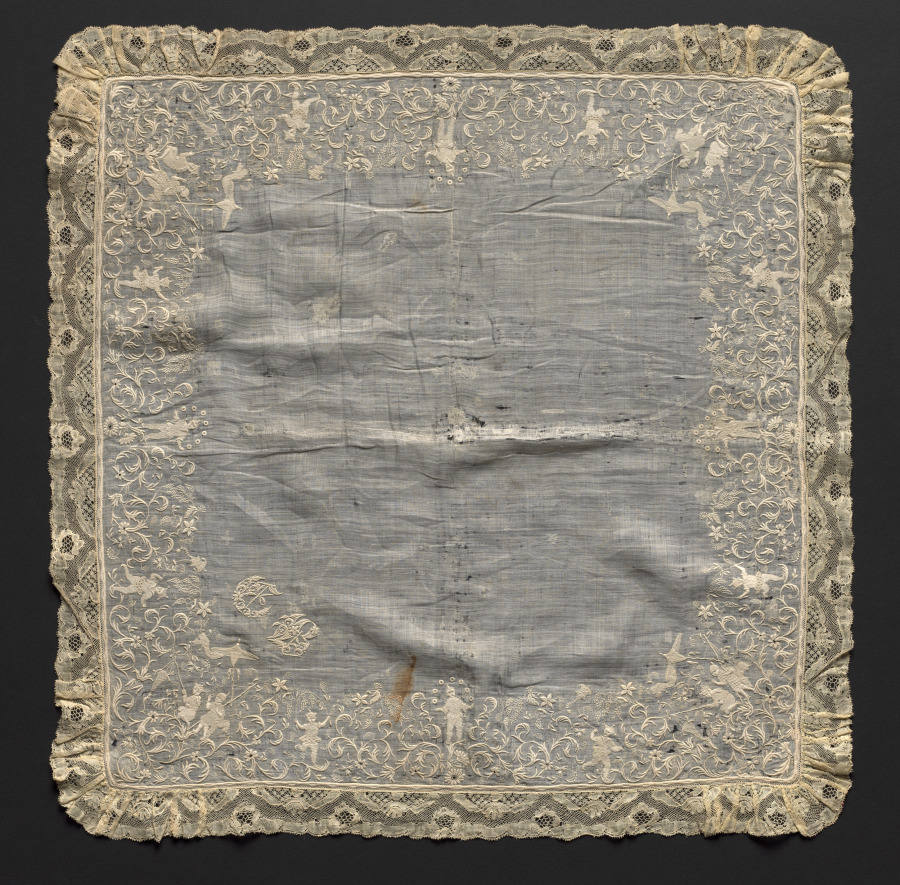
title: Lace Handkerchief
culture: France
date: 1700s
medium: Plain weave linen ground: bobbin lace (Mechelen lace) edging and embroidery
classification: Embroidery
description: The initials E. B. are embroidered in one corner of this handkerchief.